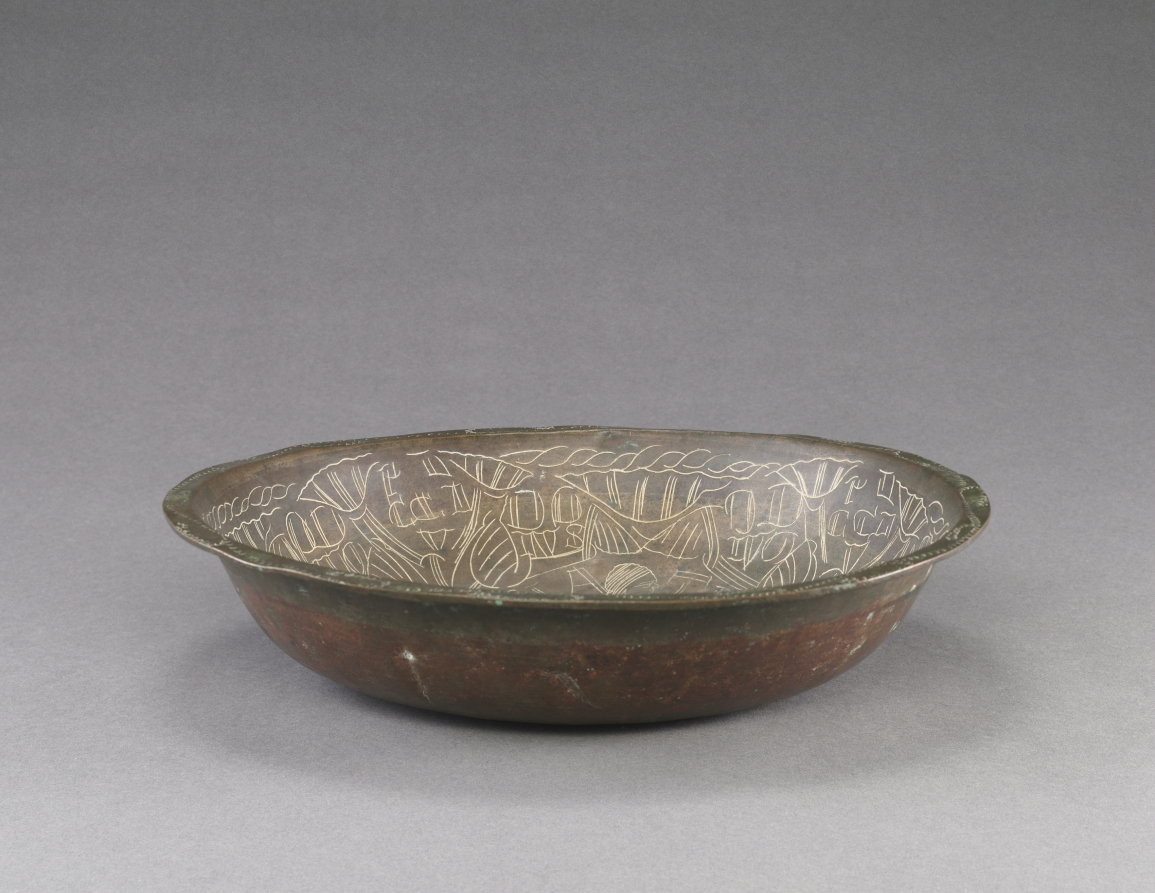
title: Bowl with Engraved Figures of Vices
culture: Germany, Gothic period, 12th century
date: 1150–1200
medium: bronze: spun, hammered, chased, and punched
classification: Metalwork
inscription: at the center of the bowl is a standing female figure with engraved identification: "SVPERBIA" (Pride); along the inner curvature are four bust-length figures with engraved names: "IDOLATRIA" (Idolatry), "INVIDIA" (Envy), "IRA" (Anger); and "LVXVRIA" (Self-Indulgence).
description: At the center of this bowl stands a female figure identified as SUPER[BI]A (pride). Represented along the curvature are four more bust-length figures: [I]DOLATRIA (idolatry), INVIDIA (envy), IRA (anger), and LUXURIA (self-indulgence). Bowls of this type were likely produced in medieval Germany and widely traded throughout northern Europe. Because of the moralistic symbolism employed in their iconographic programs, it has been suggested that such bowls were used in monasteries for hand washing during penitential activities. More recently, it has been suggested that they served as teaching aids for rhetorical instruction in medieval classrooms.